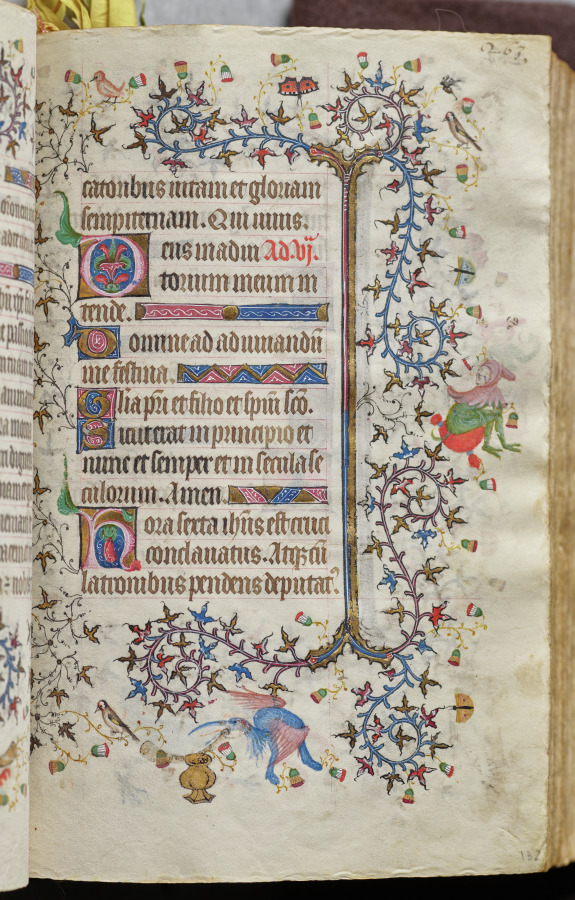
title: Hours of Charles the Noble, King of Navarre (1361-1425): fol. 132r, Text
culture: France, Paris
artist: Master of the Brussels Initials and Associates (French)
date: c. 1405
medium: ink, tempera, and gold on vellum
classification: Bound Volume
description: This precious volume was obviously highly prized by its owner, the French-born King of Navarre, who had his coat of arms painted on no less than twenty folios. Rather than directly commissioning this manuscript from a specific workshop, it seems that Charles the Noble acquired his book of hours -- perhaps ready-made for the luxury market -- while on a trip to Paris in 1404-05. A collaborative effort, six painting styles are evidenced within the pages of this codex, those of two Italians, two Frenchmen, and two Netherlanders. The painter who was responsible for the planning and decoration of the book, and who produced seventeen of the large miniatures, was a Bolognese artist known as the Master of the Brussels Initials. His principal assistant, responsible for most of the borders, was a Florentine who signed his name "Zecho" da Firenze on folio 208 verso.